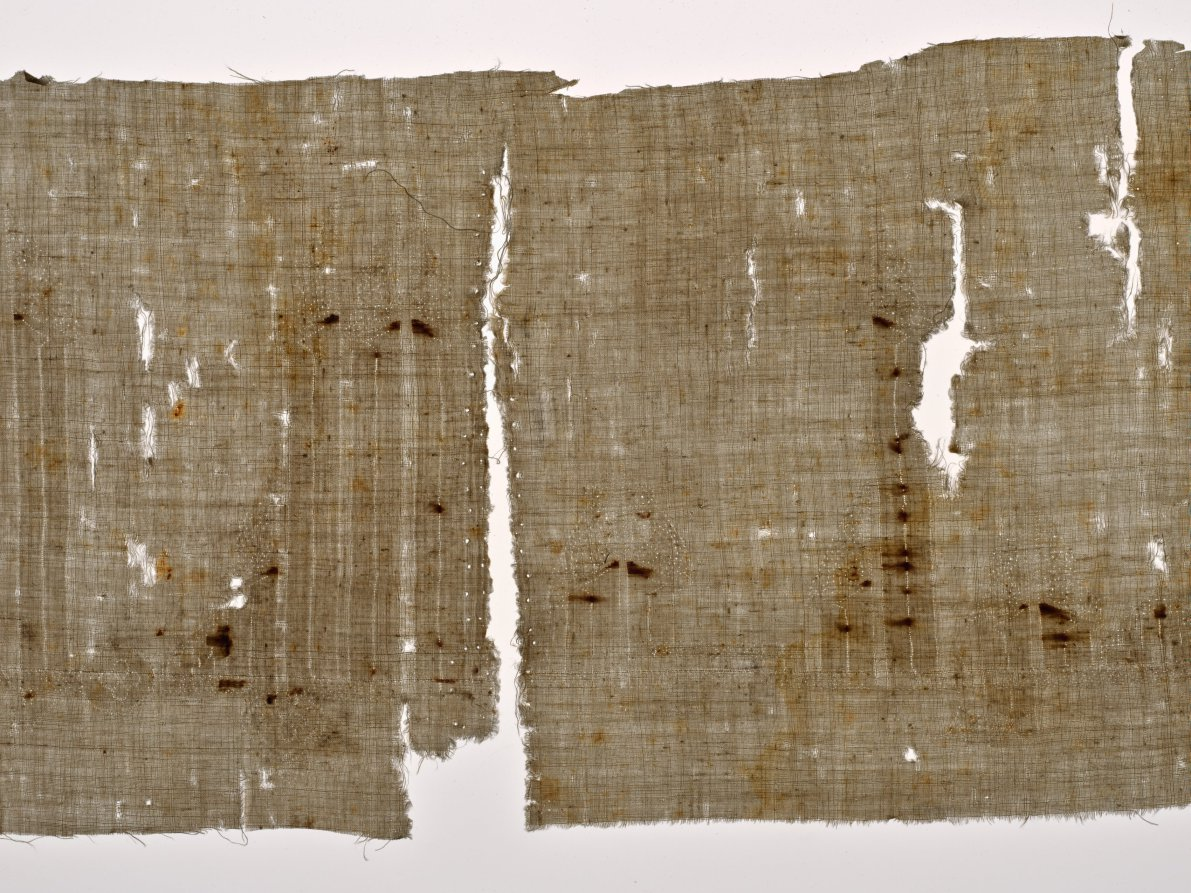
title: Tiraz of Caliph ‘Abd al-Rahman III, from the reliquary of Santa Librada, Cathedral of Seqüenza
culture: Spain, Cordoba, Spanish Umayyad period (756–1031)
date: 941–42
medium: Linen; silk: embroidery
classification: Embroidery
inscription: only the traces of a very large-scale elaborately foliated Kufic inscription preserved, largely in the form of needle holes but with a few small areas where the stitches are intact. This is approximately the second half of the original full inscription, which measured well over two meters long; the bulk of the original textile with the first half of the inscription was formerly preserved in the Cathedral of Siquenza. As preserved on the two fragments, the full inscription reads: "[Commander of the Be]lievers al-Masir li-Din al-Muslimin, may God support him! That which was made through the agency of Durri, his servant, in the year thirty and three hundred."